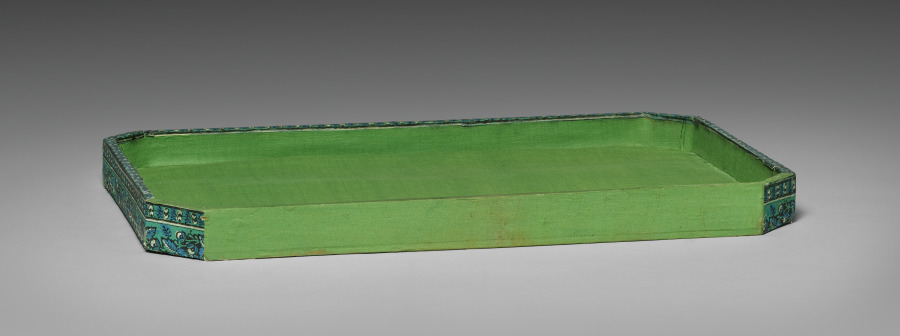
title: Chest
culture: Italy, Venice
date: 1700s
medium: leather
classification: Miscellaneous